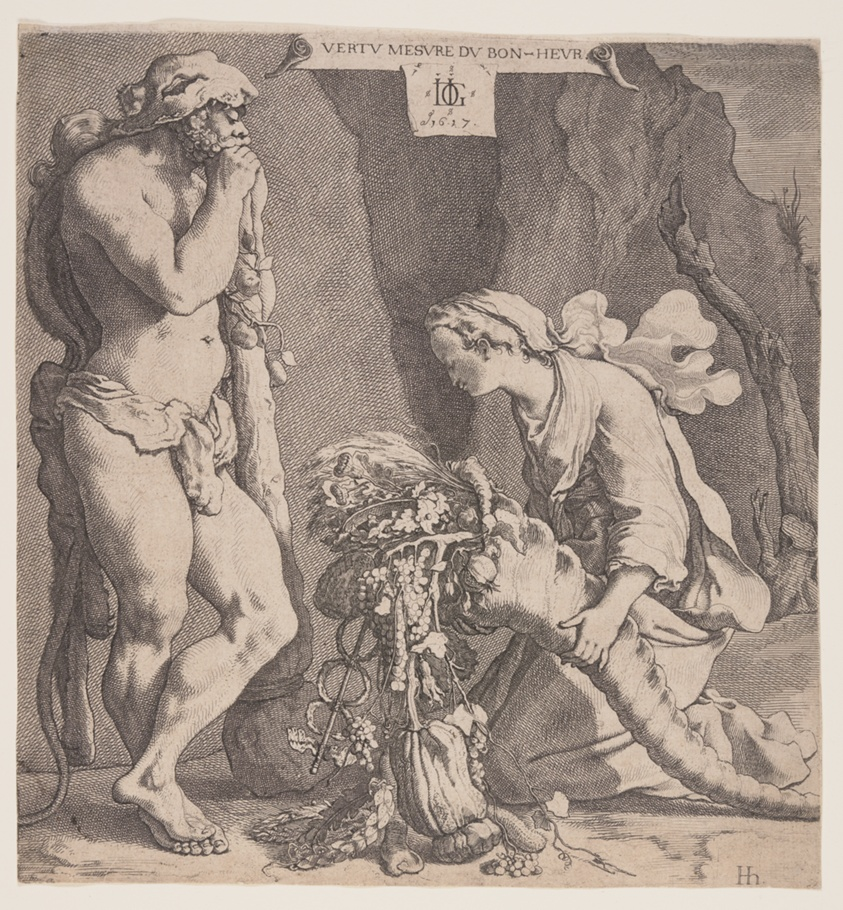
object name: Print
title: Fortuna Pouring Out the Horn of Plenty Before Hercules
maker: Jacques de Gheyn III; Dutch, c. 1596–1641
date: 1617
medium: Etching on laid paper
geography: Netherlands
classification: etching; paper; print; prints and drawing